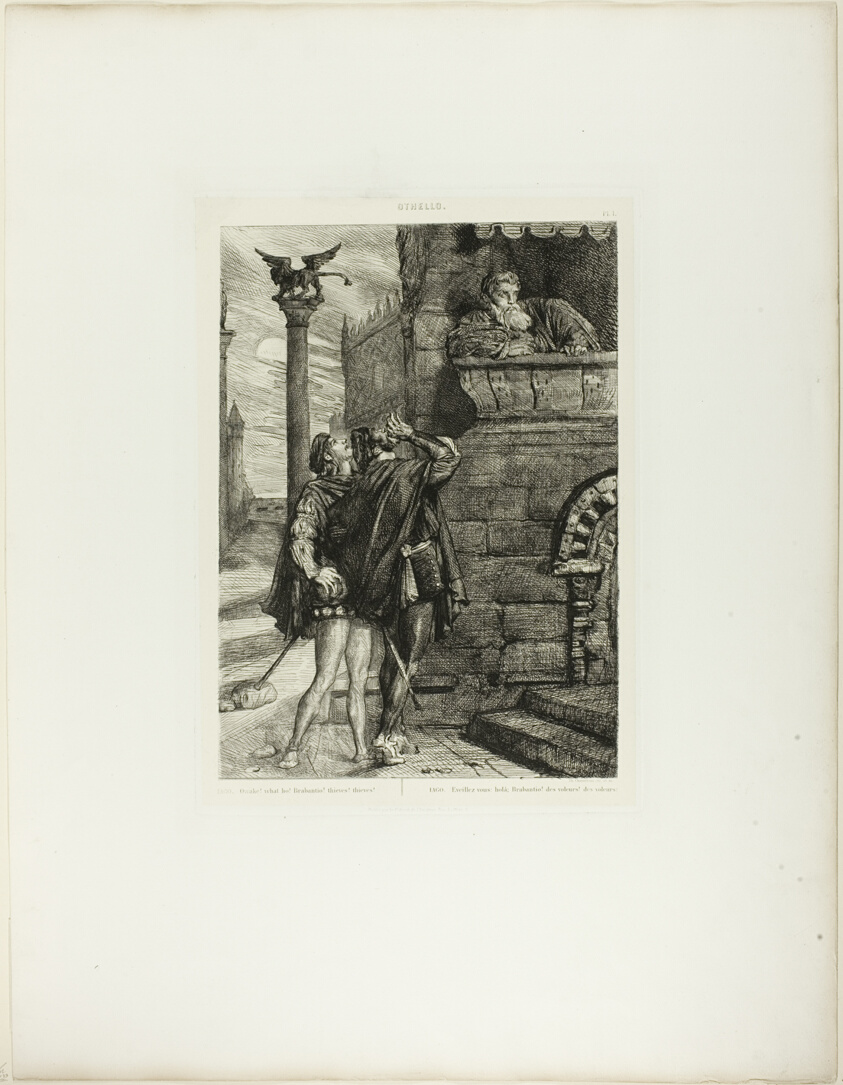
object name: Print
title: Owake! What Ho! Brabantio!plate 1 (act 1, scene 1) from Othello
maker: Théodore Chassériau (French, 1819-1856)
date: 1844, printed 1900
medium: Etching, engraving and drypoint on ivory China paper, laid down on white wove paper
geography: France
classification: etching; print; prints and drawing